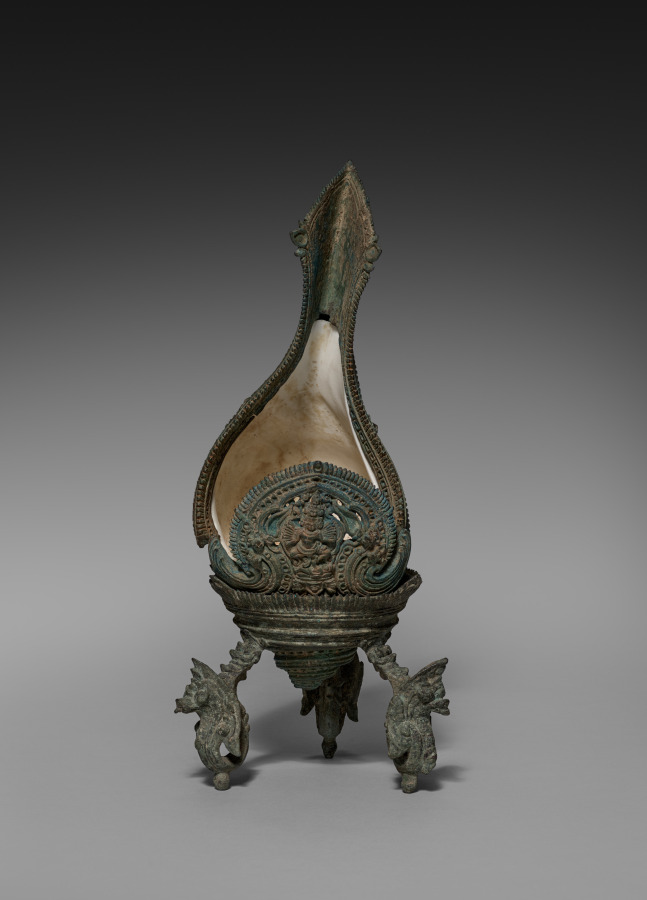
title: Conch Shell with a Figure of Hevajra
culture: Cambodia, Khmer, Angkor Period, 12th-13th Century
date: 1100s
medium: shell and bronze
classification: Sculpture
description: A royal temple like Banteay Chhmar was built for performing rituals and to honor images of gods, Buddhas, and other sacred or enlightened beings for the sake of the kingdom’s protection and ongoing prosperity. Conch shells were blown at the start of rituals to make the sound corresponding to the syllable om. The dancing figure of Hevajra, a Buddhist being of enlightenment with eight heads, sixteen arms, and four legs, has been worked into the bronze embellishment of the shell. Hevajra was elevated to a prominent position in Khmer Buddhism of the Angkorian period as the standard figure denoting the practice of rituals prescribed in a text called the Hevajra-tantra. The tripod stand with three serpents is probably not original to the shell.